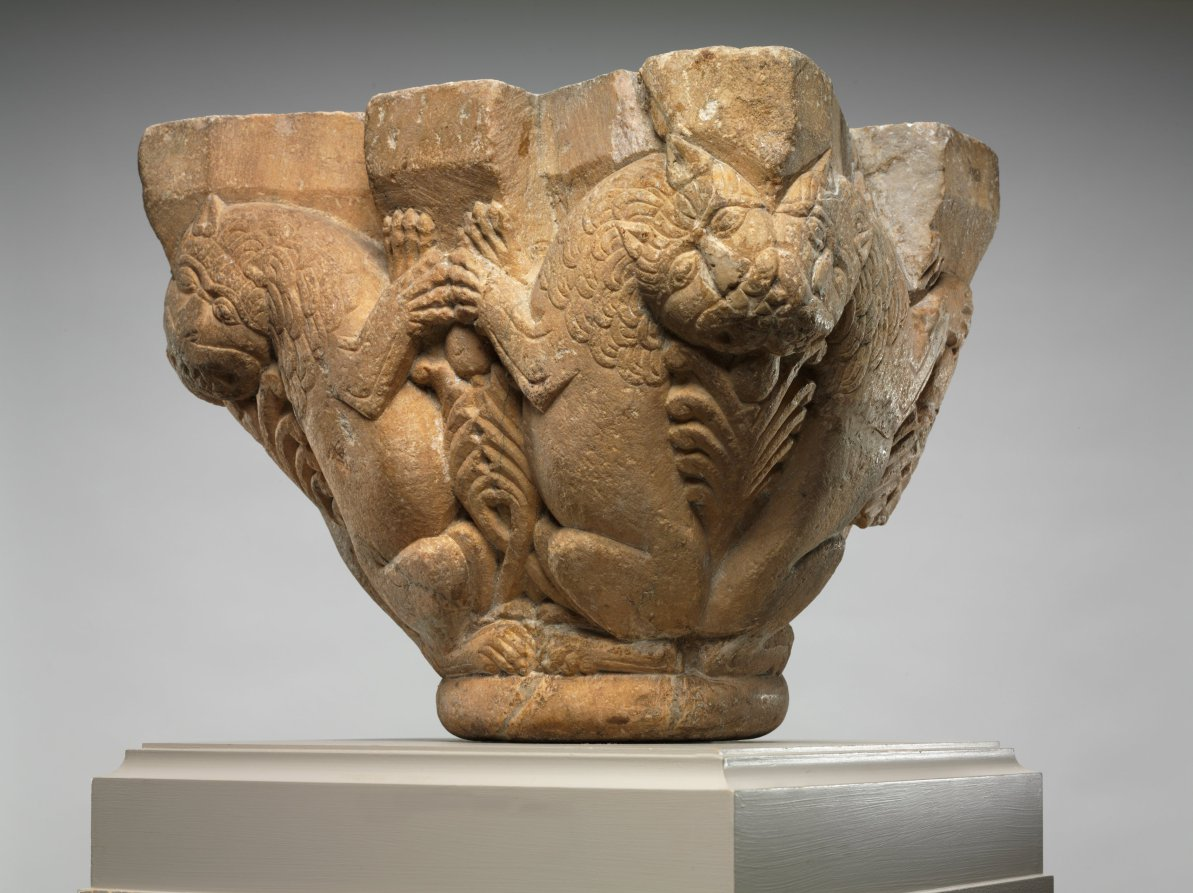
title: Engaged Capital with Lions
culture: Northern Spain (Navarre ?) or Southwest France (Pyrénées or Roussillon ?), mid-12th century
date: 1145–64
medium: marble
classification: Sculpture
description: The compositional motif of confronted and addorsed beasts illustrated on this capital was especially popular in churches along the pilgrimage roads.